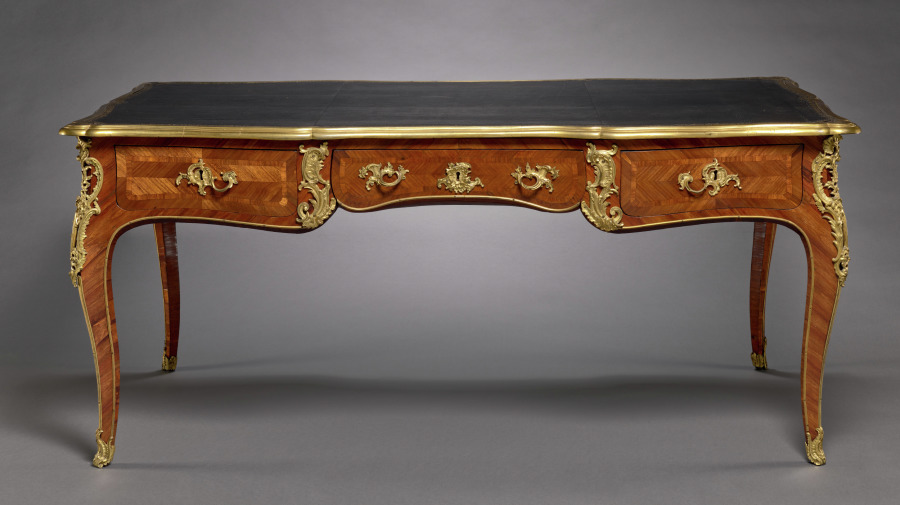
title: Table Desk (bureau plat)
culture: France, Paris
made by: Jacques Dubois (French, 1693–1763)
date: c. 1750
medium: wood marquetry with gilt bronze mounts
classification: Furniture and woodwork